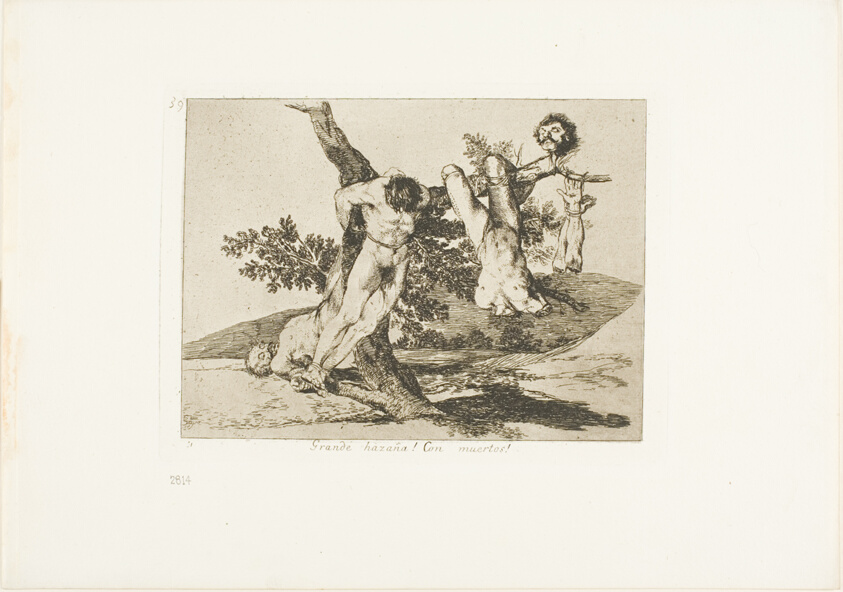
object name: Print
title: A Heroic Feat! With Dead Men!, plate 39 from The Disasters of War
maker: Francisco José de Goya y Lucientes (Spanish, 1746-1828)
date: 1812/15, published 1863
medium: Etching, lavis and drypoint on ivory wove paper with gilt edges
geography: Spain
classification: etching; print; prints and drawing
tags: war